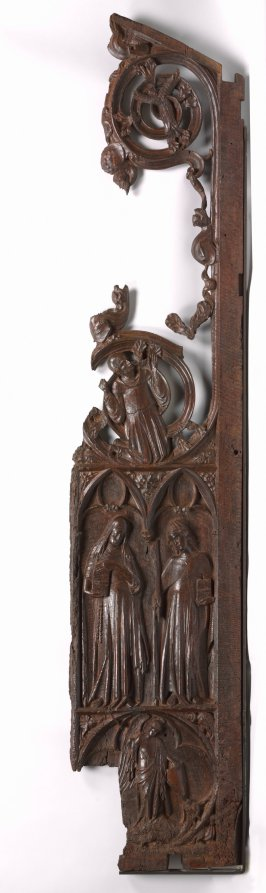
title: Panel from a Choir Stall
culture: Spain, Catalonia, Monastery of Pedralbes, 14th century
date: c. 1330–1340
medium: walnut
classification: Furniture and woodwork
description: The large panel shown here was probably the end panel of a stall that faced another across the choir of a Gothic church. The panel is carved with the figure of St. Francis of Assisi kneeling in prayer and receiving the stigmata. Two standing figures also appear on this panel: a nun at the left (perhaps St. Claire) and a female martyr at the right. Below is St. Michael and the dragon.